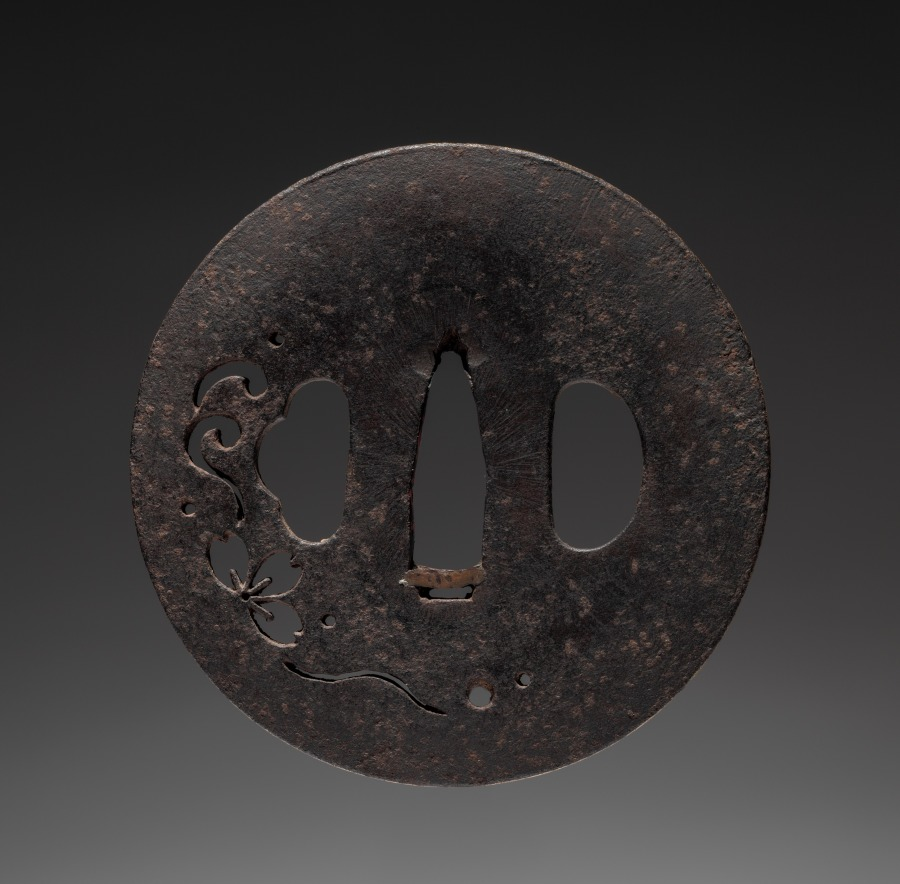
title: Sword Guard (Tsuba)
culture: Japan, possibly Edo period (1615-1868)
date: c. 1615–1868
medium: iron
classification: Arms and Armor